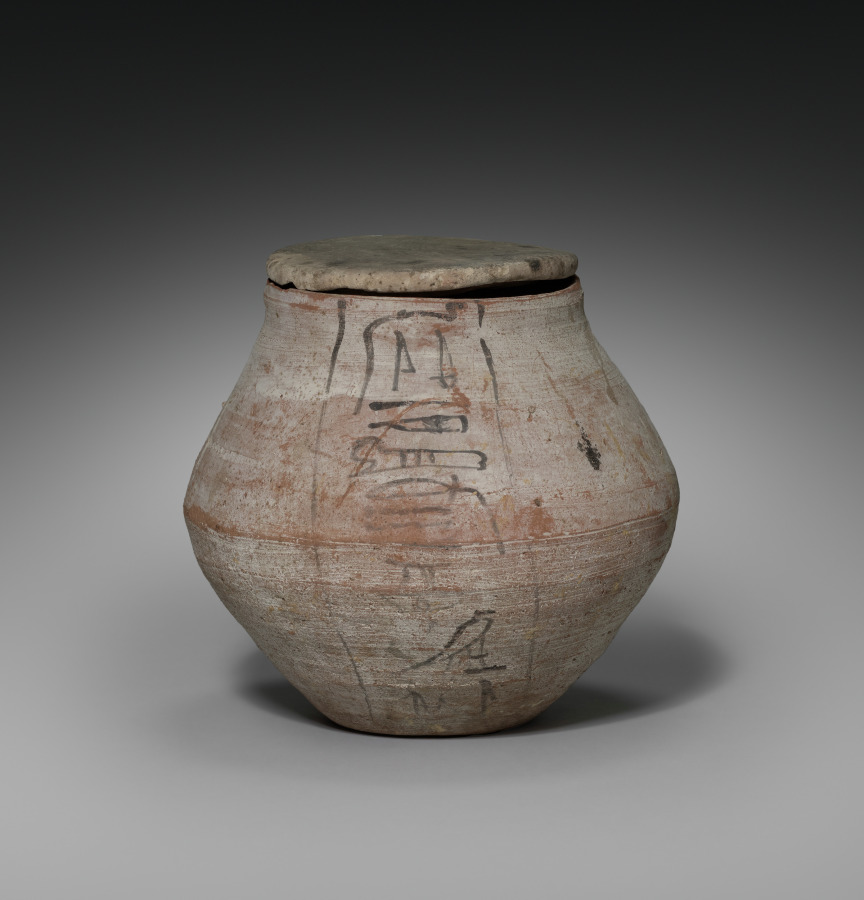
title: Shawabty Jar with Lid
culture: Egypt, New Kingdom (1540–1069 BCE), Dynasties 19–20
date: 1295–1069 BCE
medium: Nile silt ware; lid of limestone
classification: Funerary Equipment